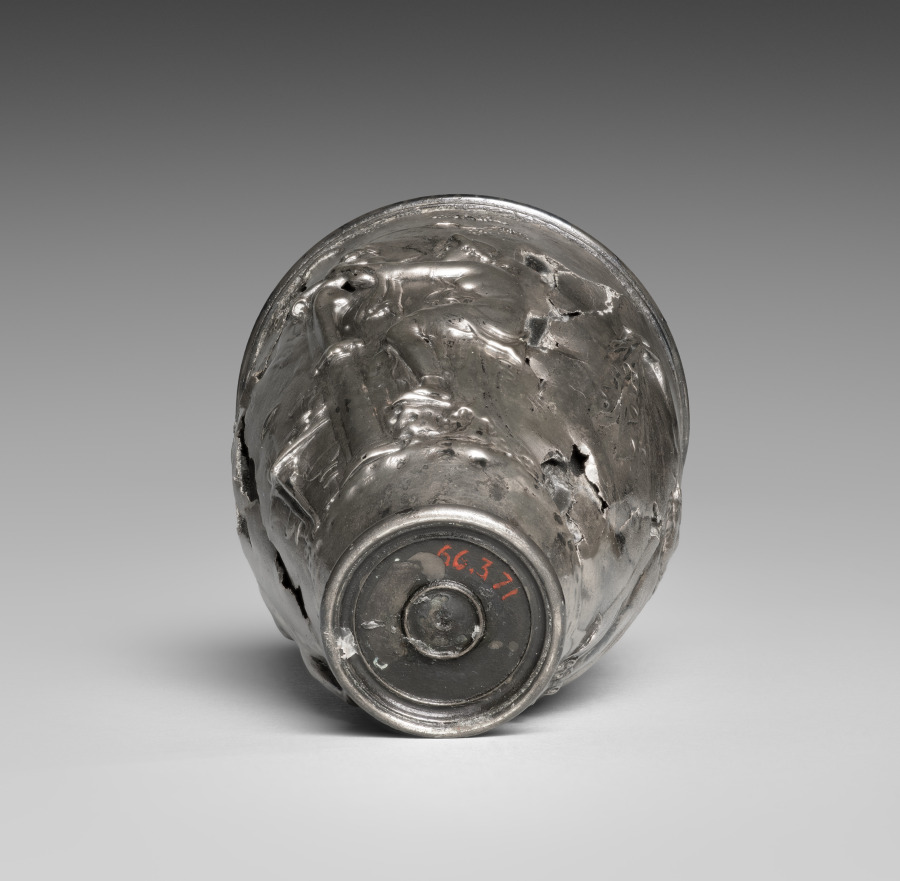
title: The Vicarello Goblet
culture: Italy, Vicarello (ancient Aquae Apollinares), Roman, Augustan period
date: 25 BCE–25 CE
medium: silver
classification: Metalwork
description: This masterpiece of the Roman silversmith’s art is exquisitely worked in relief. The multifigure scene centers on a rustic shrine of the ithyphallic fertility god Priapus, son of Dionysos. He takes the form of a stylized boundary marker atop a column, where a woman seems to have brought him to life by touching him. To the left sits a table with votive offerings to the god. Flanking the shrine are a satyr and maenad, dancing ecstatically.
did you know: This silver cup was found north of Rome at Vicarello (ancient Aquae Apollinares), probably in 1862.